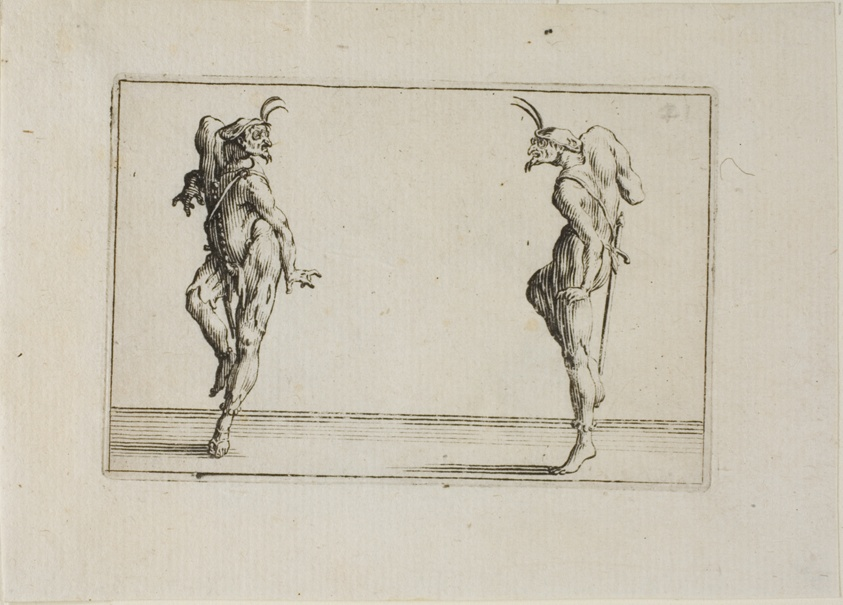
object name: Print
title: The Two Pantaloons Looking at Each Other, from The Caprices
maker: Jacques Callot (French, 1592-1635)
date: c. 1622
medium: Etching in black on ivory laid paper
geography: France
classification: etching; print; prints and drawing